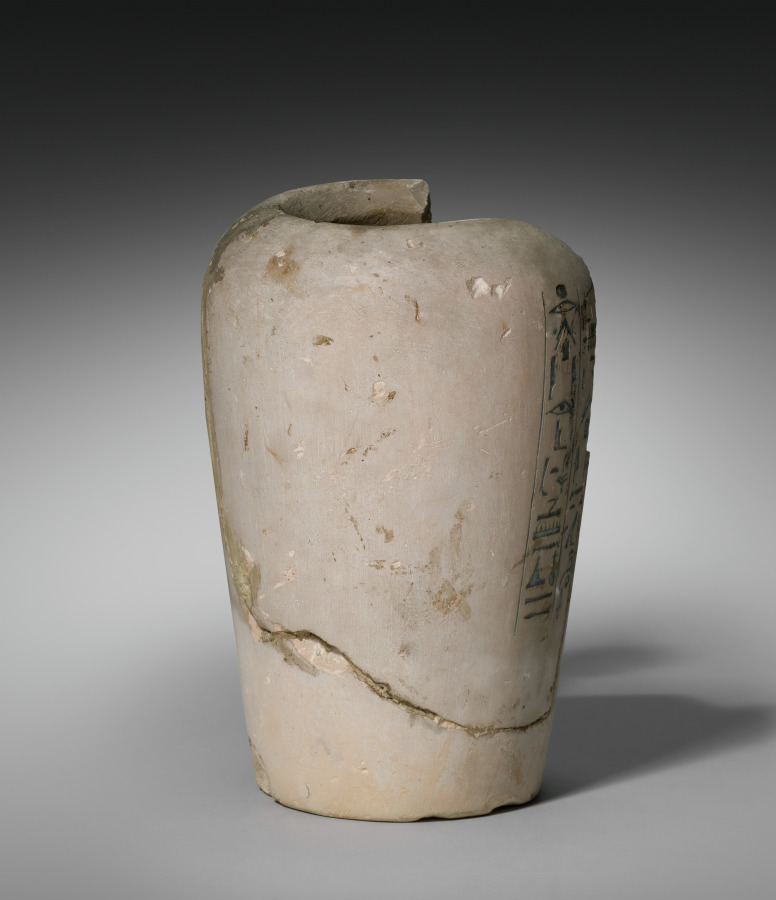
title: Canopic Jar with Lid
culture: Egypt, New Kingdom (1540–1069 BCE), Dynasty 18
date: 1540–1296 BCE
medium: limestone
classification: Funerary Equipment